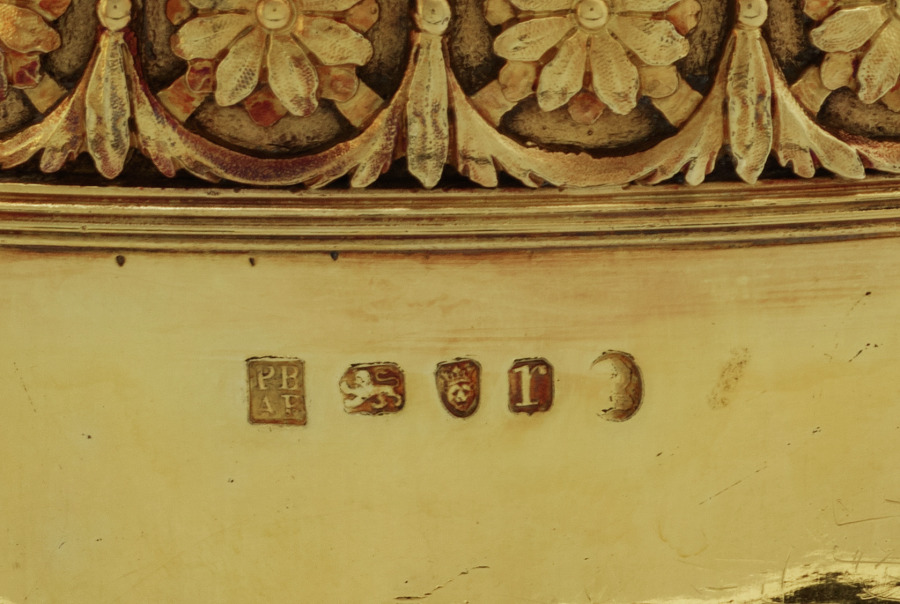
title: Trophy Cup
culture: England, 18th century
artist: Peter Bateman (British, 1740–1825)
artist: Anne Bateman (British, 1748–1813)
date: 1792–93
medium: silver gilt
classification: Silver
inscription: Engraved arms: Grosvenor impaling Egerton and Grey (arms of Robert Grosvenor (1767–1845), the first Marquess of Westminster, and Lady Eleanor Egerton (1770–1846))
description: Silver fulfilled a prominent role in projecting wealth, status, power, and ritual in British life during the 1600s and 1700s. Elaborate forms such as this trophy, with its swags of flowers, neoclassical rosettes, and acanthus spears, not only represented wealth in its sheer silver weight but also provided royal and aristocratic owners a surface for displaying engraved coats of arms. Engraved on one side of this trophy cup can be found the arms of Robert Grosvenor (1767–1845), the first Marquess of Westminster, and Lady Eleanor Egerton (1770–1846), whom he married in 1794, a year after the trophy’s completion. The other side depicts preparations for a horserace, the most culturally significant leisure activity enjoyed by aristocratic families in the 1700s. Grosvenor owned a number of famous horses and was likely awarded this trophy following a successful race.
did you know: This trophy cup has a lid. See cover record.